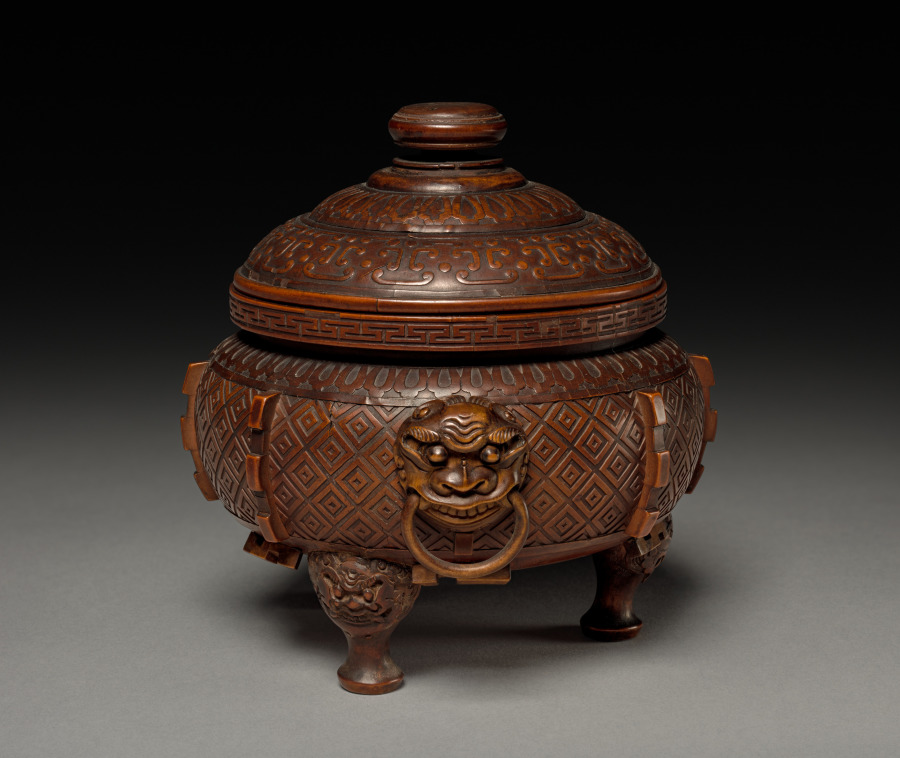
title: Tripod with Cover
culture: China, Qing dynasty (1644-1911)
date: late 1700s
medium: carved wood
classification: Wood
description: In the Qing (1644–1911) dynasty, luxury items became more affordable to larger parts of the society, including women, merchants, and literati in non-official positions. Imperial patronage and a growing urban population encouraged consumption of luxury goods and local craftmanship. This wooden tripod illustrates superb carving skills and the creative mind of the skilled artisan who sought clients on a competitive market.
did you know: Each leg of the tripod is decorated with a lion head.